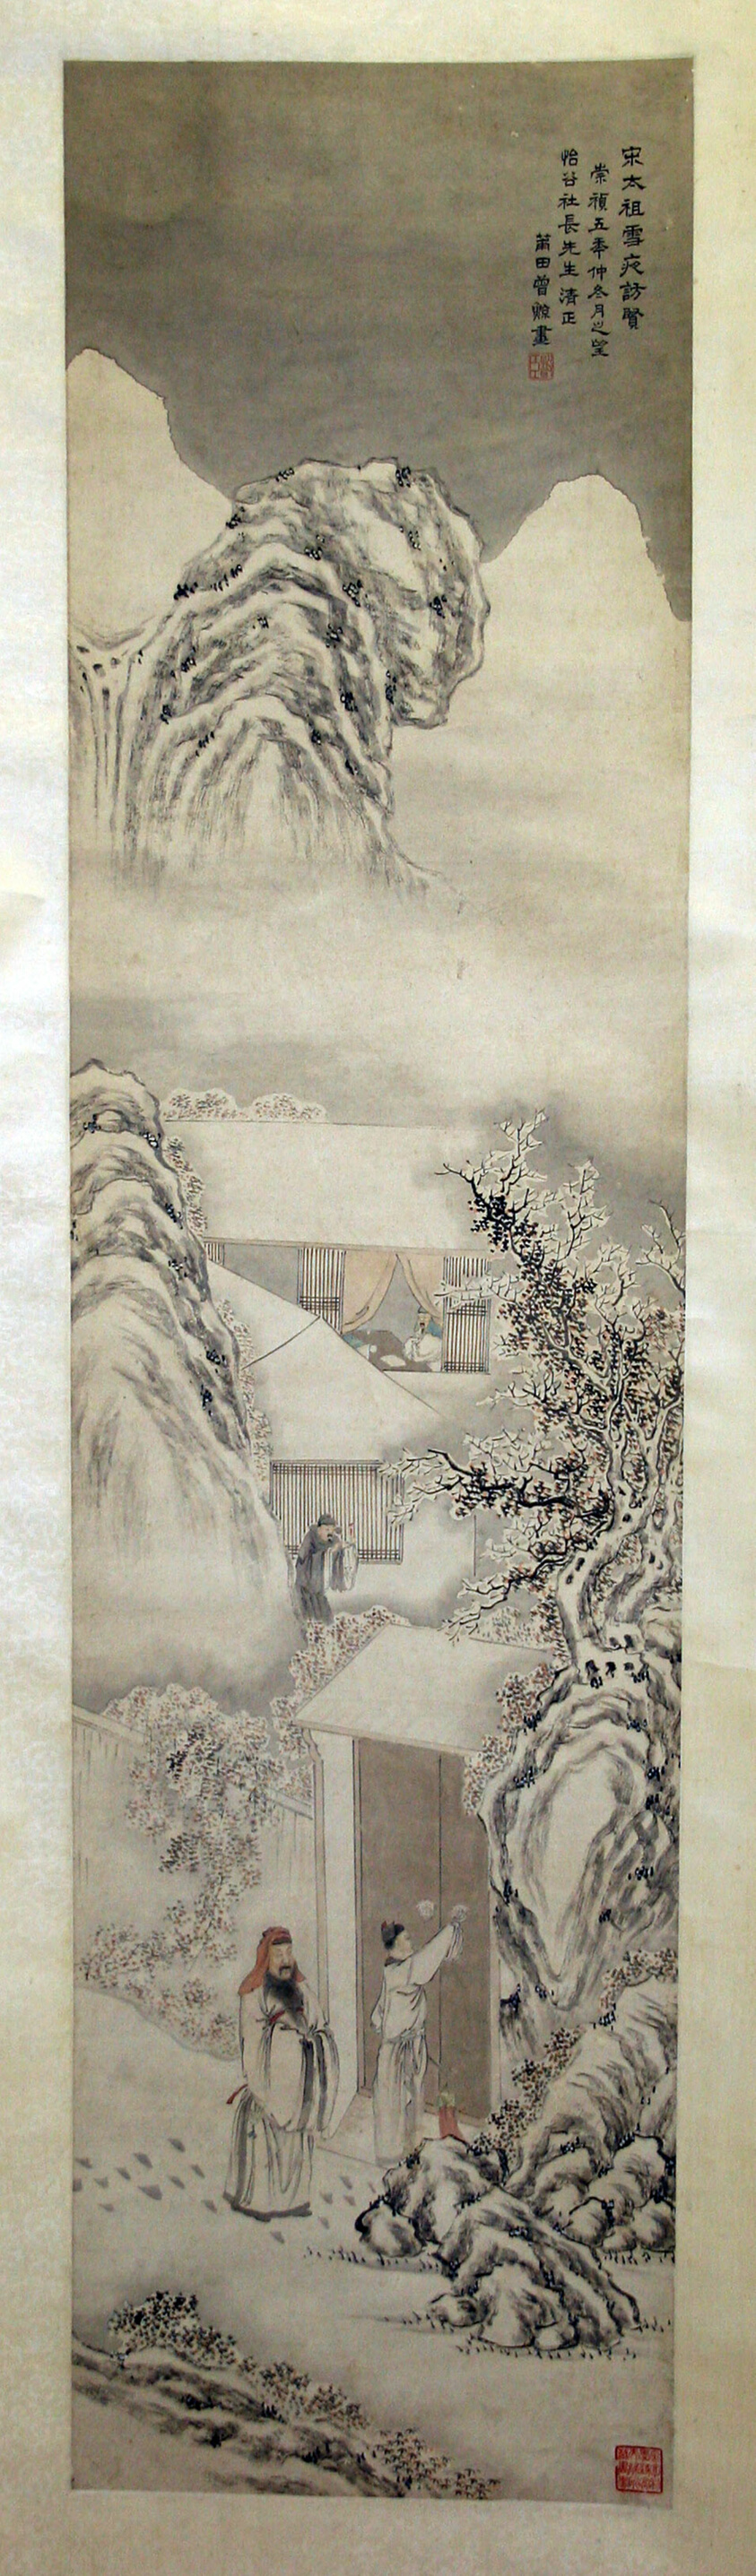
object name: Painting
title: Emperor Song Taizu Visiting Scholar on Snowy Night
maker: Attributed to Zeng Jing （Chinese, 1568-1650 )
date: late 19th century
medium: Hanging scroll; ink and light color on paper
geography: China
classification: hanging scroll; painting; asian art